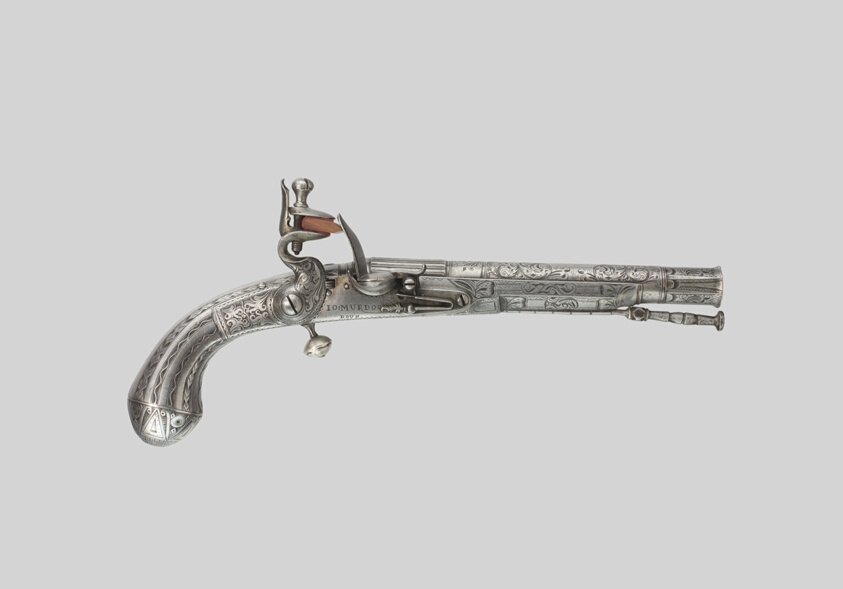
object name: Arms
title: Flintlock Belt Pistol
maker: Gunsmith: John Murdoch (Scottish); Doune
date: c. 1780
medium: Steel, leather, and wood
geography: Doune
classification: firearm-handgun; arms; arms and armor